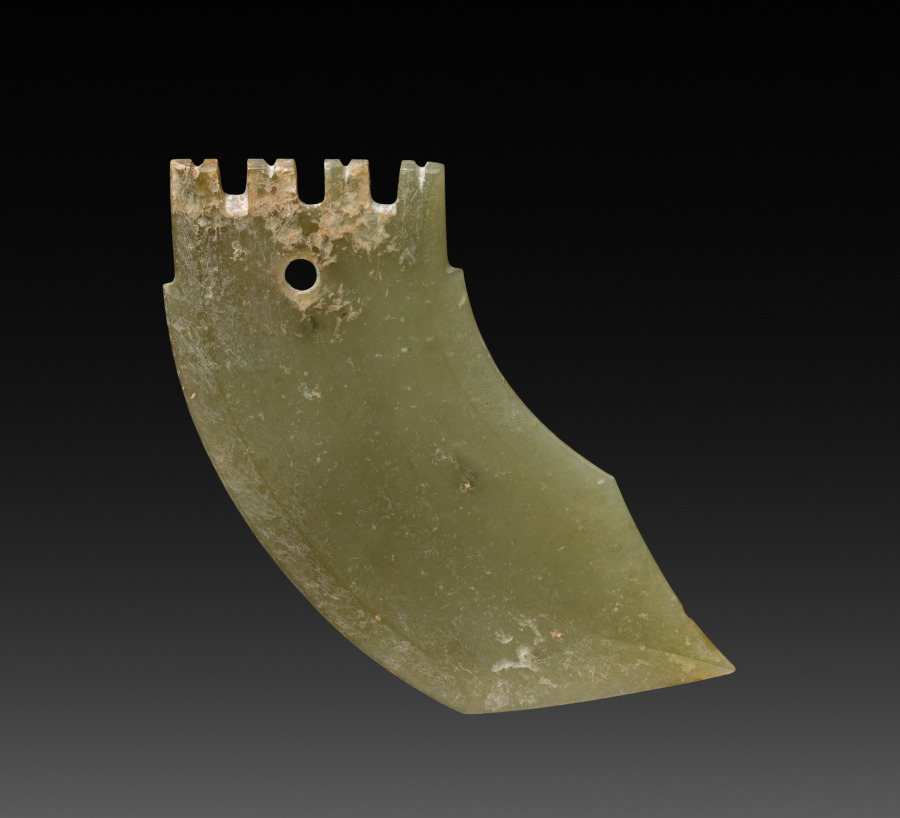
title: Dagger-Axe Shaped Pendant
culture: China, Shang dynasty (c. 1600–c. 1046 BCE) to Western Zhou dynasty (c. 1046–771 BCE)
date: 1200–1000 BCE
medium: jade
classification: Jade